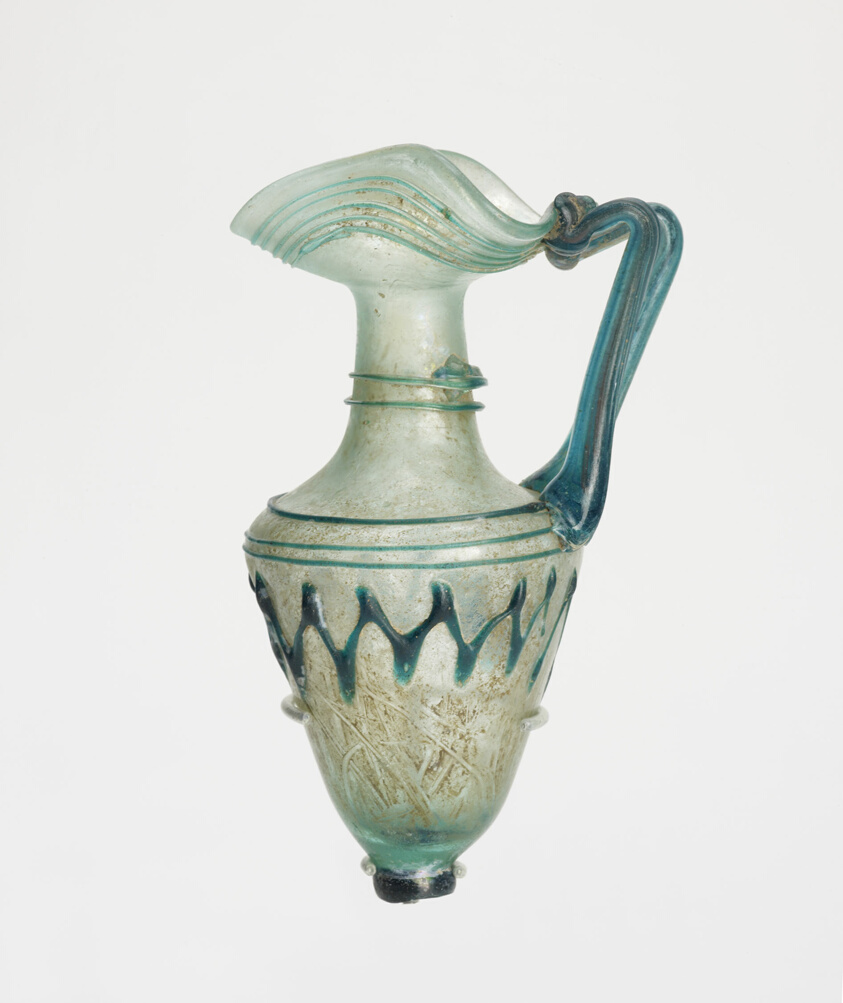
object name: Vessel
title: Jug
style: palestinian, syrian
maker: Late Roman or Byzantine; Eastern Mediterranean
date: 4th century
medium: Glass, blown technique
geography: Levant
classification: vessel; glass; ancient art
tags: vessels